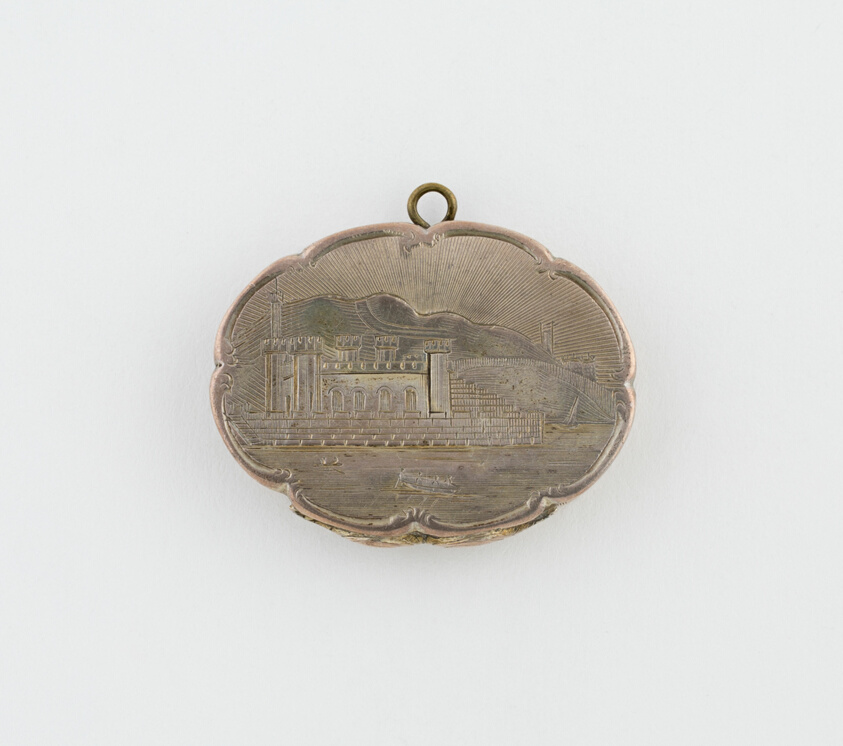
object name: Metalwork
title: Vinaigrette with View of Scarborough Spa Building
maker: Marked DP; Birmingham, England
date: 1847/48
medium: Silver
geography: Birmingham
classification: vinaigrette (container for health care); container for personal use; box; european decorative arts; metalwork; silver; decorative object/ornament